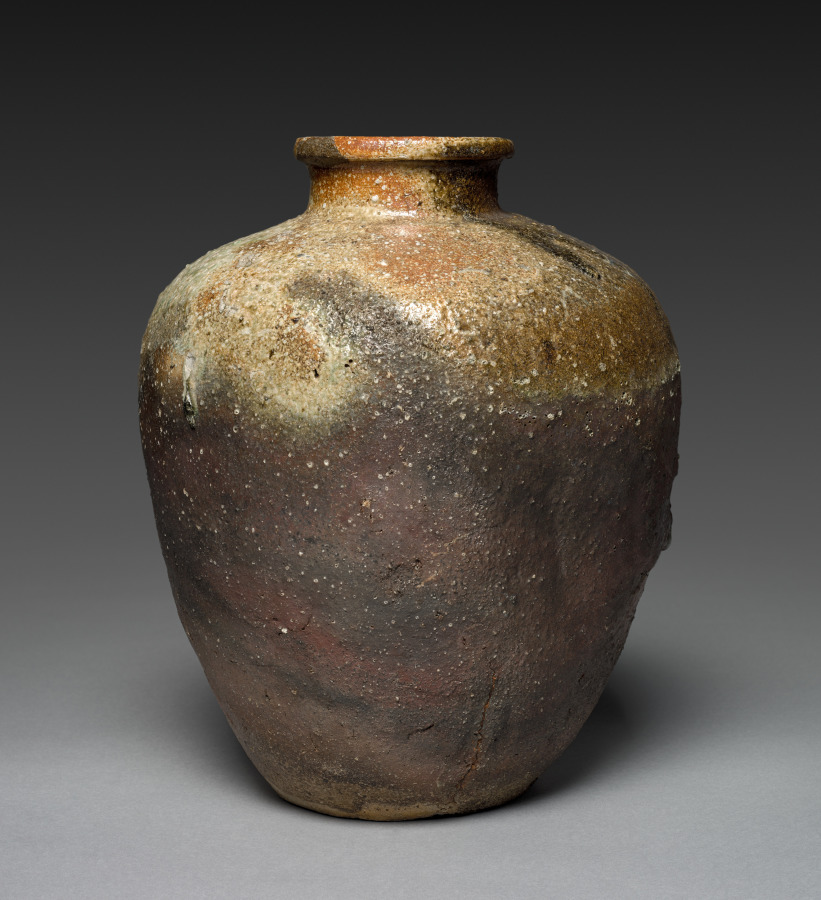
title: Storage Jar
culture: Japan, Muromachi period (1392–1573)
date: 1500s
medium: Stoneware with natural ash glaze (Shigaraki ware)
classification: Ceramic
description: Shigaraki ware is produced in the Shigaraki area of Shiga prefecture to the east of Kyoto in the Kansai region. The clay from Shigaraki has a warm orange color. When fired in an anagama kiln, a type of wood-fired kiln that uses the oxidization process, the free flow of air allows for the appearance of the ash and mineral glazes that characterize the works. Shigaraki storage jars like this one, a tsubo, have been popular for storing tea leaves since the Muromachi period.